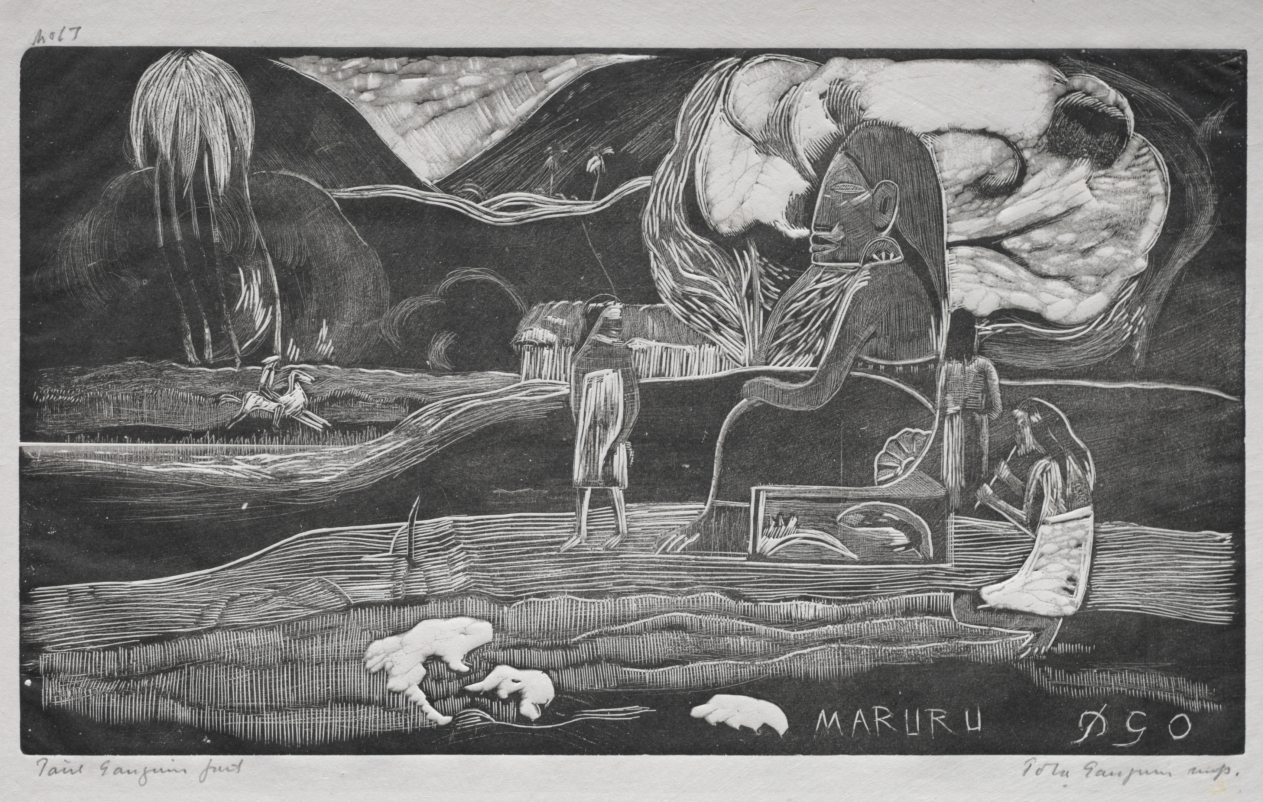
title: Tahitian Series: Worship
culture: France, 19th century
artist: Paul Gauguin (French, 1848–1903)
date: 1893–94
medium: woodcut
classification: Print